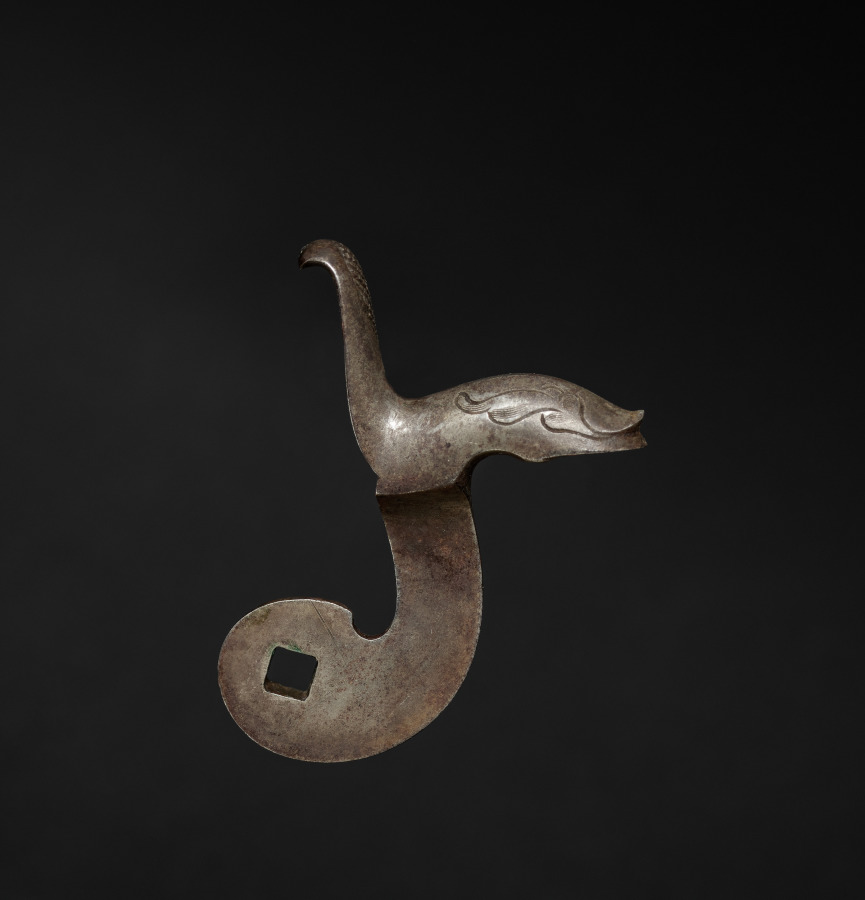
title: Gun-Lock Hammer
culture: England, early 19th century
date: c. 1800–1825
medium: steel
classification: Arms and Armor